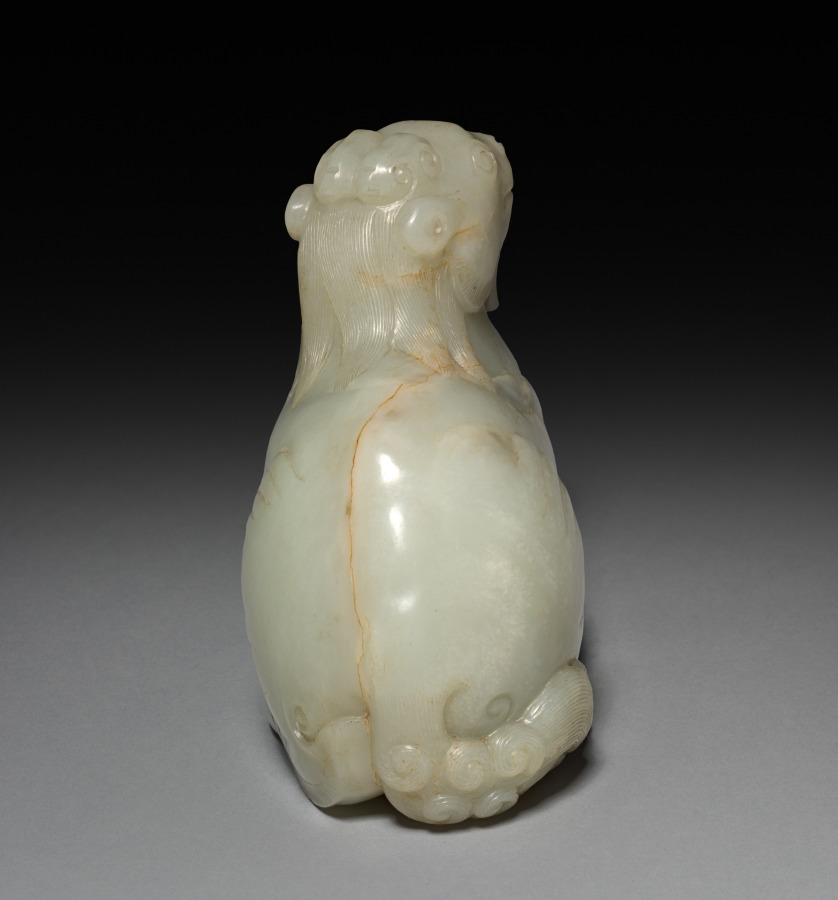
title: Fantastic Animal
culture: China, Qing dynasty (1644-1911)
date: 1700s–1800s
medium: jade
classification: Jade